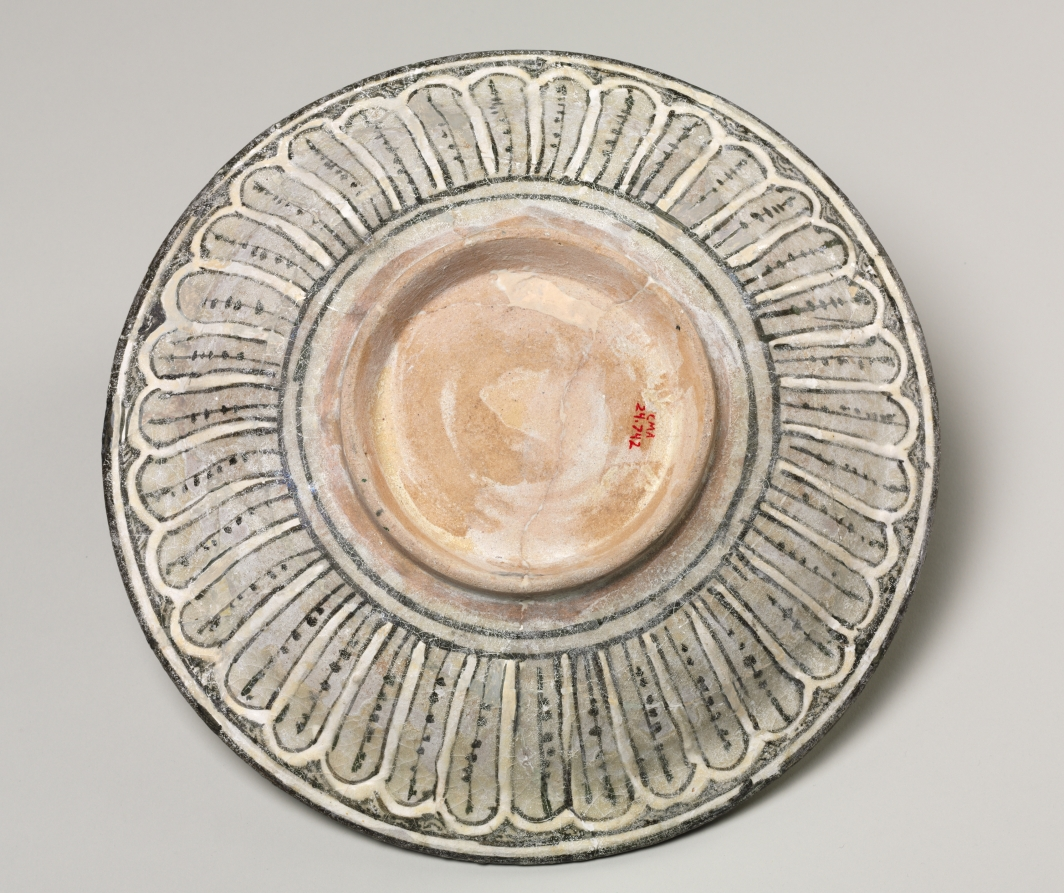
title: Ceramic dish with deer, phoenix, and lotus blossoms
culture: Iran, probably Sultanabad, Ilkhanid period (1256–1353)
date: 1300–1350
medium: Fritware with underglaze-painted design, Sultanabad ware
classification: Ceramic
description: The design of a flying phoenix on the rim was frequently represented on vessels and tilework of this period. The motif was derived from China, most likely transmitted on prestigious silk textiles.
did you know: Fritware is made of ground quartz, glass frit (partially fused glass), and a small proportion of fine white clay to approximate the light color and weight of Chinese porcelain.